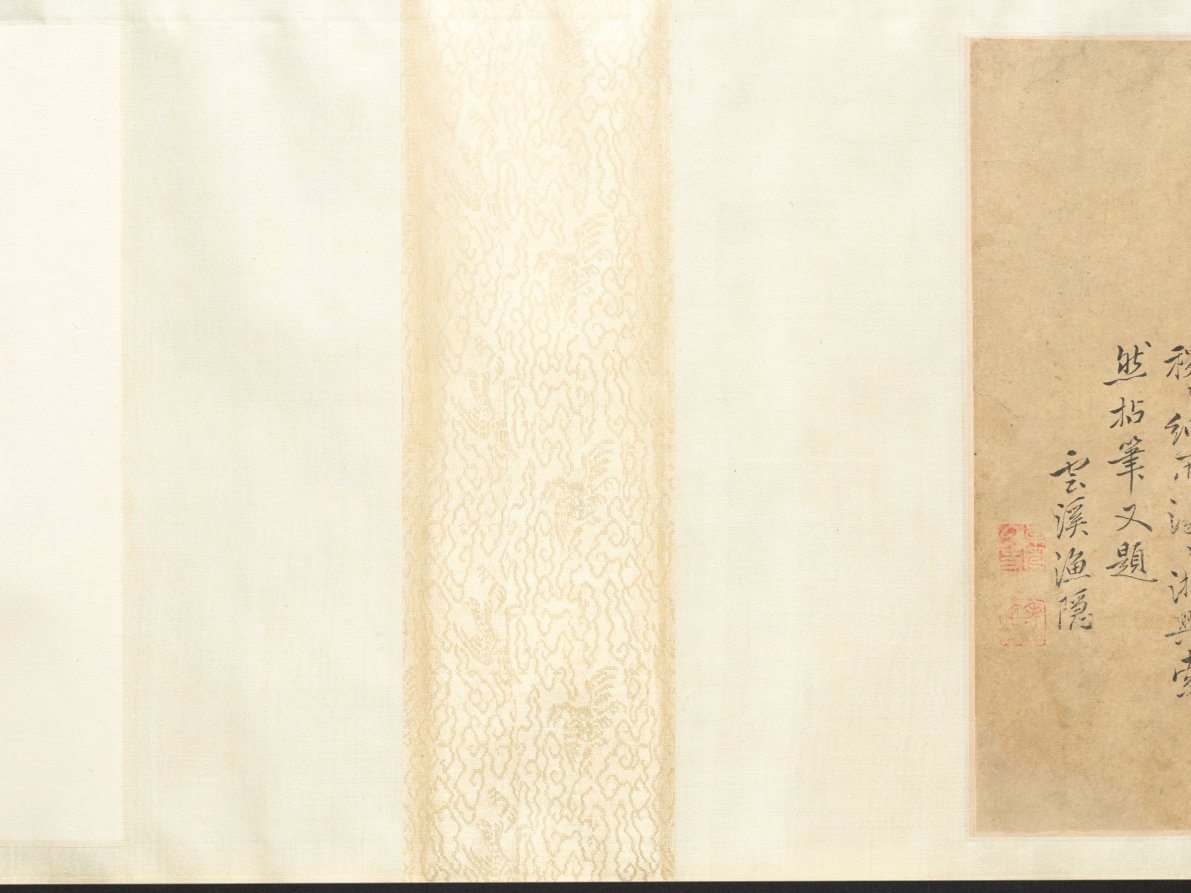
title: Fisherman's Joy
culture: China, Ming dynasty (1368–1644)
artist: Qian Gu (Chinese, 1508–c. 1578)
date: 1572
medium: Handscroll; ink and light color on paper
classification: Painting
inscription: Artist's inscription, signature, and seal: On the autumn day of the jen-shen year [1572], P'eng-ch'eng, Ch'ien Ku painted [this]. [seal] Hsüan-ch'ing shih. 2 colophons, both dated 1689, and 5 additional seals of Yün Shou-p'ing (1633-1690).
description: This painting has a scene showing two small crafts, each manned by two fishermen, practicing a traditional fishing method. In one of them, a man uses a bamboo pole to direct the movements of a cormorant bird sent into the water. Cormorant fishing, witnessed in some areas of the lower Yangzi River, appears in Zhe school paintings. Qian Gu may have borrowed these narrative figure scenes from Zhe school paintings, while his vantage point, brushwork, and soft tones align with the Wu school style. Scenes of fishermen appealed to urban and educated audiences who idealized the self-sufficient independence of fisherfolk.